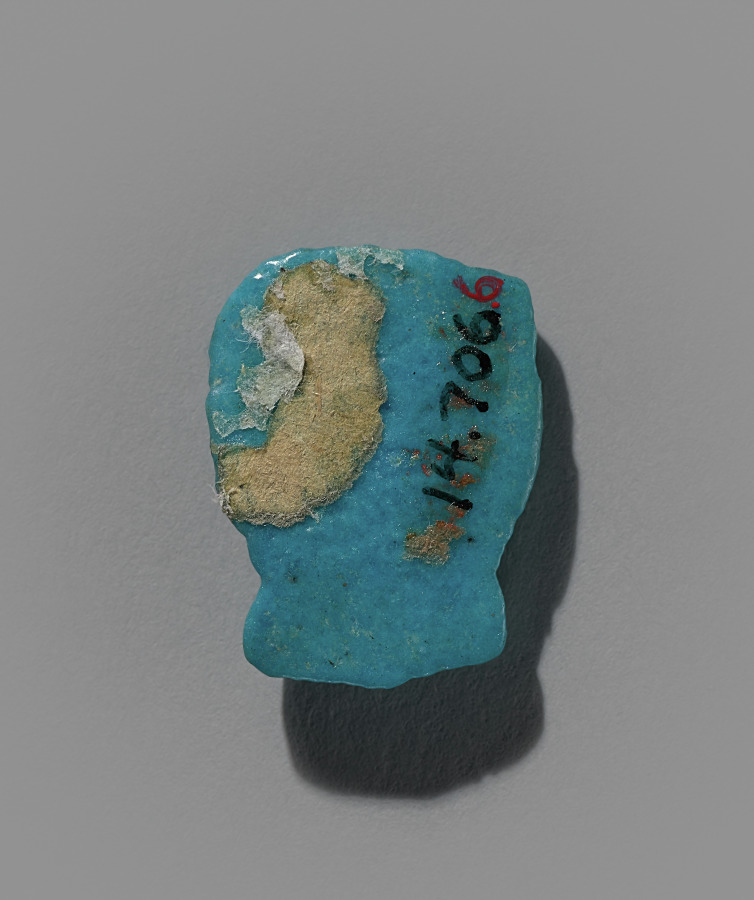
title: Food Model Amulet: Brace of Duck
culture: Egypt, New Kingdom (1540–1069 BCE), Dynasties 19–20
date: 1295–1069 BCE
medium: turquoise faience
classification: Amulets